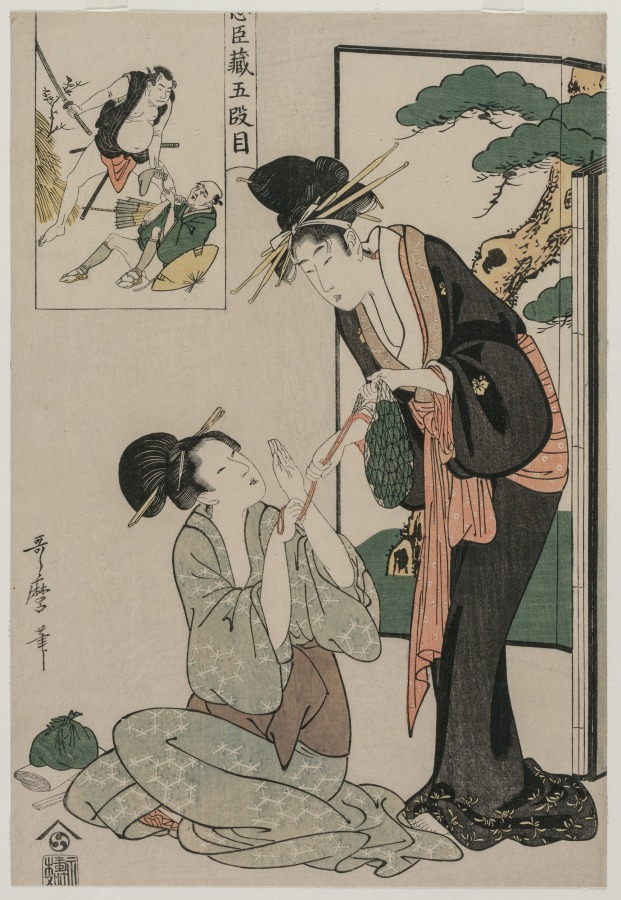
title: Chushingura: Act V of The Storehouse of Loyalty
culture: Japan, Edo period (1615–1868)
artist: Kitagawa Utamaro (Japanese, c. 1754–1806)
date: late 1790s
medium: color woodblock print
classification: Print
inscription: Artist's signature: Utamaro hitsu.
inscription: Publisher: Nishimuraya Yohachi (Eiju han, emblem).